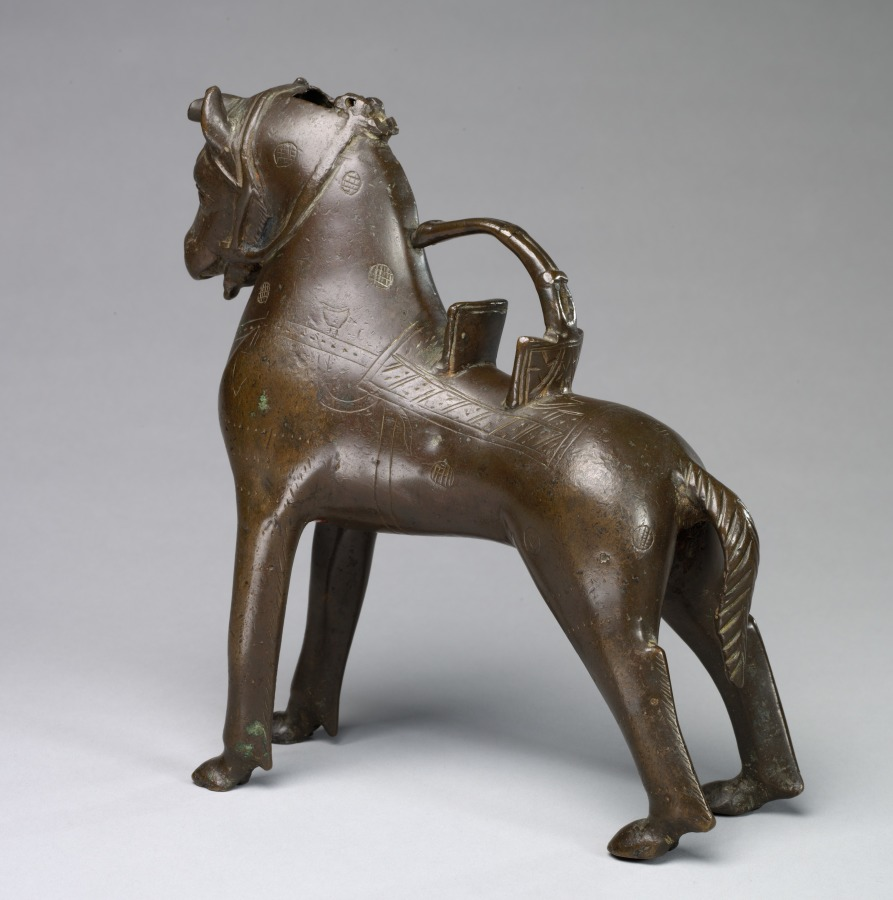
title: Aquamanile: Saddled Horse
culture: North Germany, Lower Saxony (?), 14th century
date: c. 1250–1300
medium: copper alloy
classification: Sculpture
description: Aquamanilia, from the Latin aqua meaning water and manus meaning hands, were hollow cast vessels used for hand washing. Although originally intended for liturgical use they became a common sight in the homes of the nobility in the 1200s and 1300s. Often filled with scented water, these vessels were used to wash hands just before and after eating a meal. An accompanying catch basin would have caught the water as it was being poured. Here we see a proud and alert dappled gray warhorse, highly prized in the medieval period. The saddled but riderless form is rare; other popular aquamanilia include lions, dragons, griffins, and human heads.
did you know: The pattern of crosshatched circles on the surface suggests that the horse is a dappled gray warhorse, a prized possession in the period.